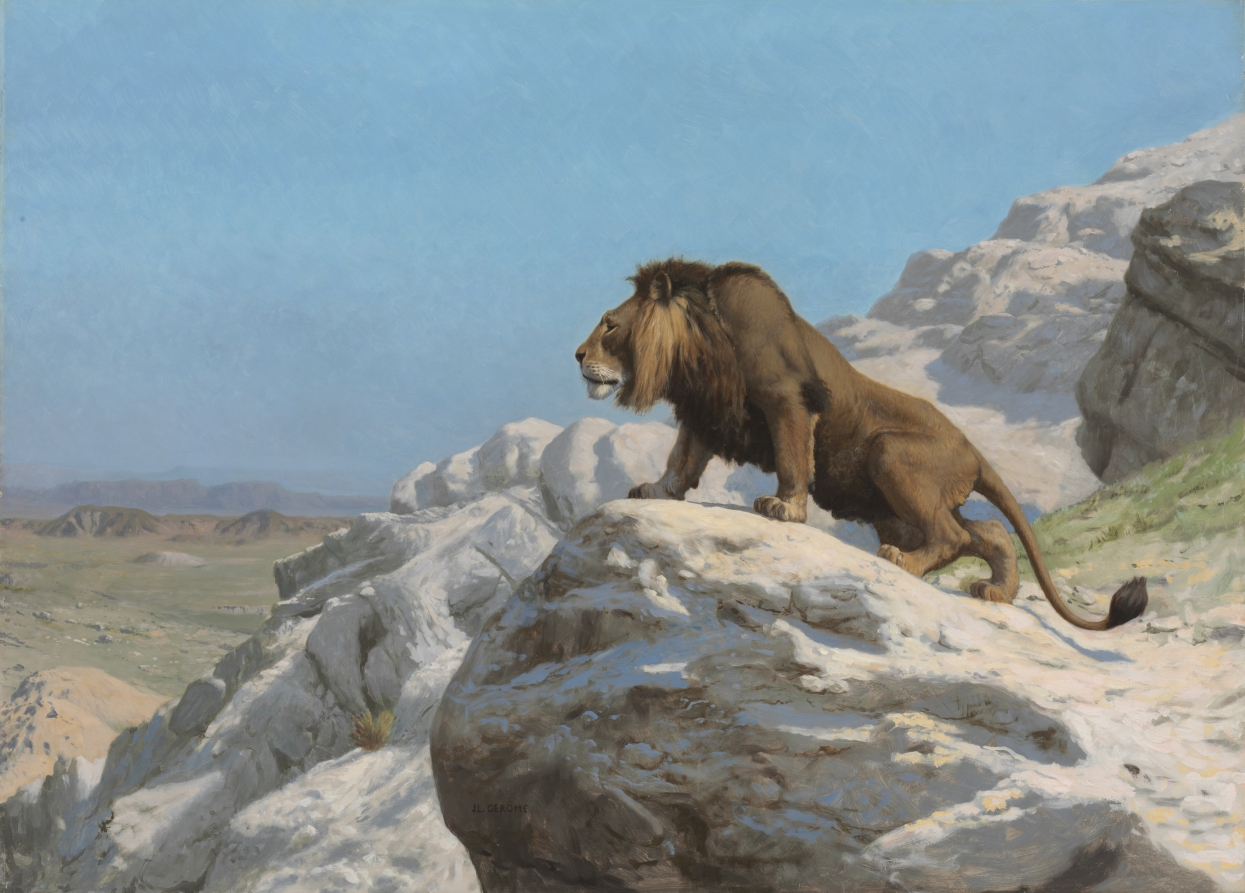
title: Lion on the Watch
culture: France, 19th century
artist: Jean-Léon Gérôme (French, 1824–1904)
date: c. 1885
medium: oil on wood panel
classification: Painting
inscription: Signed lower left: j. l. gerome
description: In addition to his fascination with the classical past, Gérôme was one of the leading painters of "orientalist" subjects-exotic and romantic themes inspired by Napoleonic adventures abroad, romantic literature, and European colonialism. From 1855, Gérôme travelled regularly in Turkey, Egypt, and Asia Minor. Long fascinated by African animals, he sketched lions in the Paris zoo as a student and later hunted them on safari in North Africa.